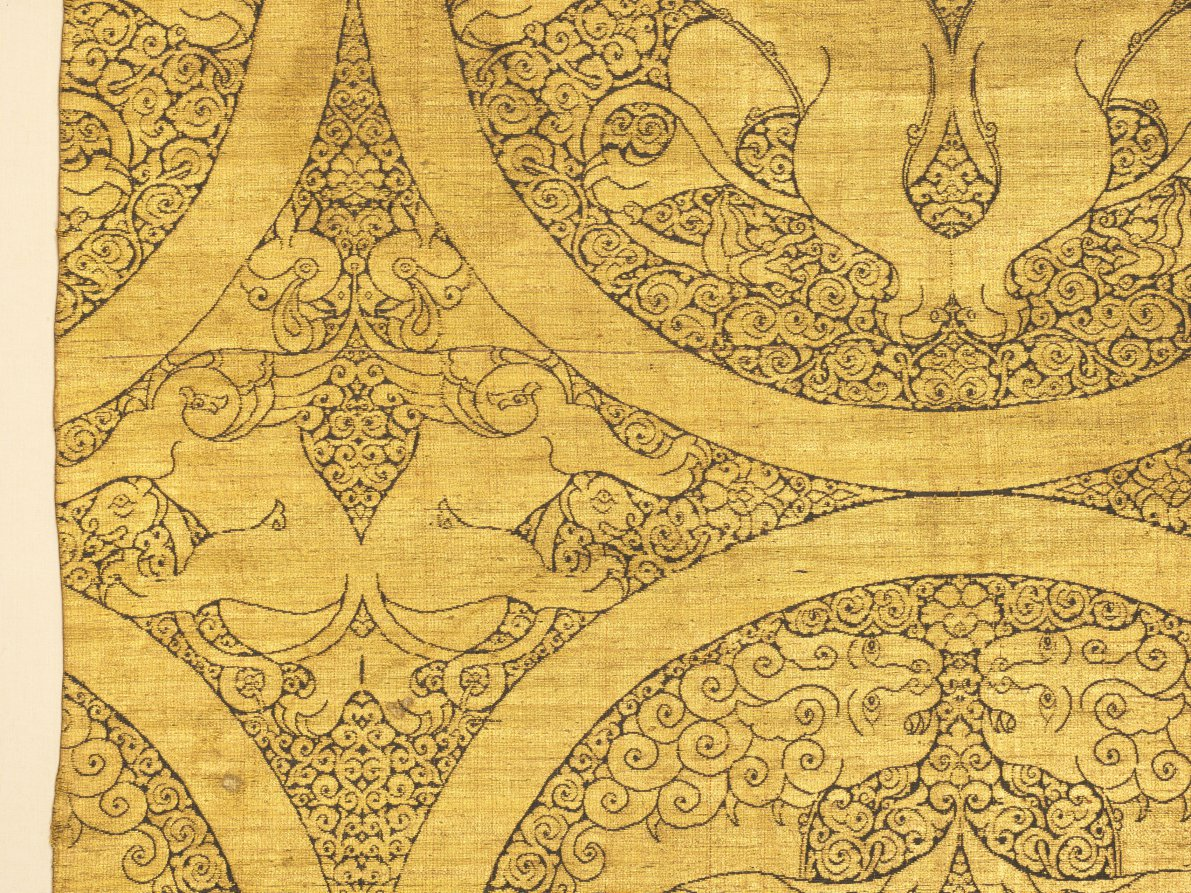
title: Cloth of gold with winged lions and griffins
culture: Central Asia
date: 1225–75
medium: Silk and gold thread: lampas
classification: Textile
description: The Mongols created exceptionally sumptuous cloths of gold to symbolize their imperial authority and legitimacy, this being the most resplendent example known. Opulent expanses of gold thread enrich the roundels, lions, and griffins in striking contrast with the intricate brown silk foliate ground. The pattern integrates motifs from Iran—paired lions in roundels and paired griffins—and from China, cloud ornaments on the lions’ wings. They suggest it was woven in an imperial workshop in Central Asia where Iranian and Chinese craftsmen worked together with local artisans. The gold is on a paper substrate associated with Asia, whereas animal skin substrates were used in Islamic lands. It is woven in a new technique developed by Iranian weavers, a combination of two weaves known as lampas, which was adopted internationally.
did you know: The tail of each paired griffin passes between its hind legs, loops around a rosette, and terminates in a feline head.